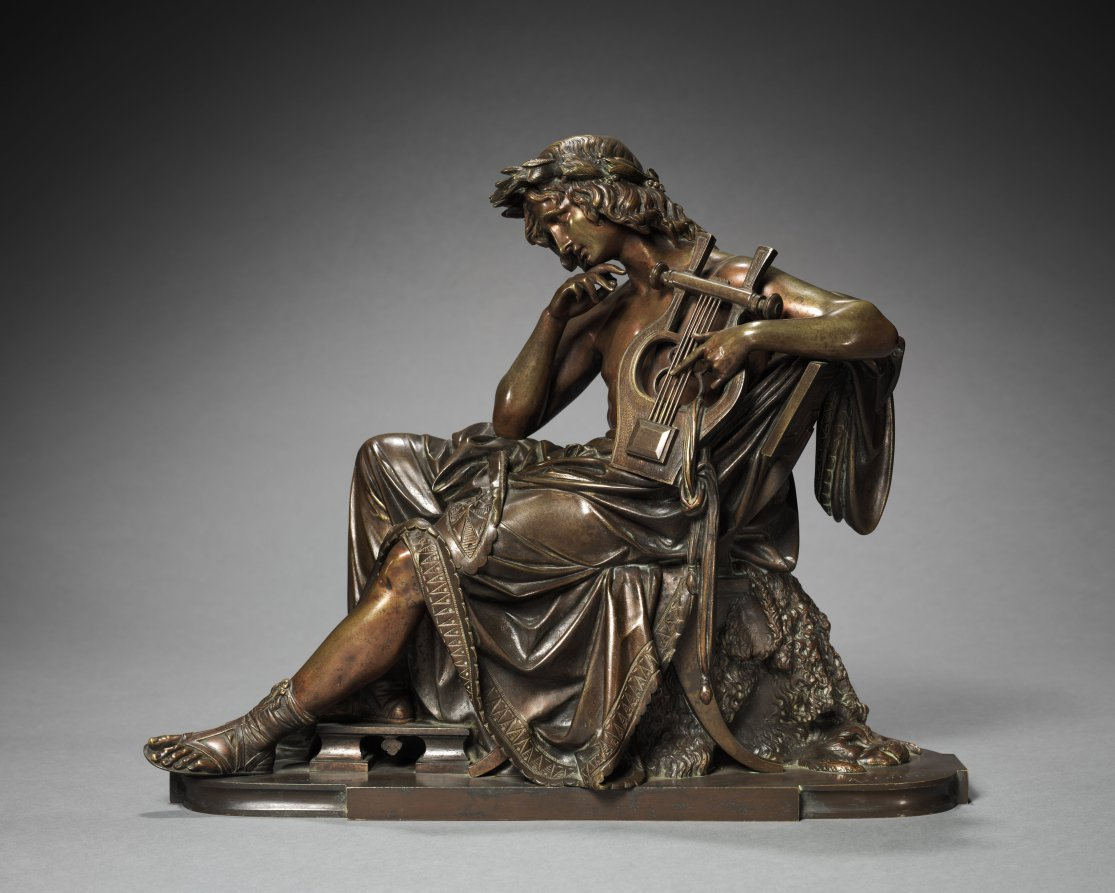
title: Orpheus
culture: France, 19th century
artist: Albert-Ernest Carrier-Belleuse (French, 1824–1887)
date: early 1860s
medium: bronze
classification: Sculpture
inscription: Signed: "A. Carrier"; inscribed: "Boyer"